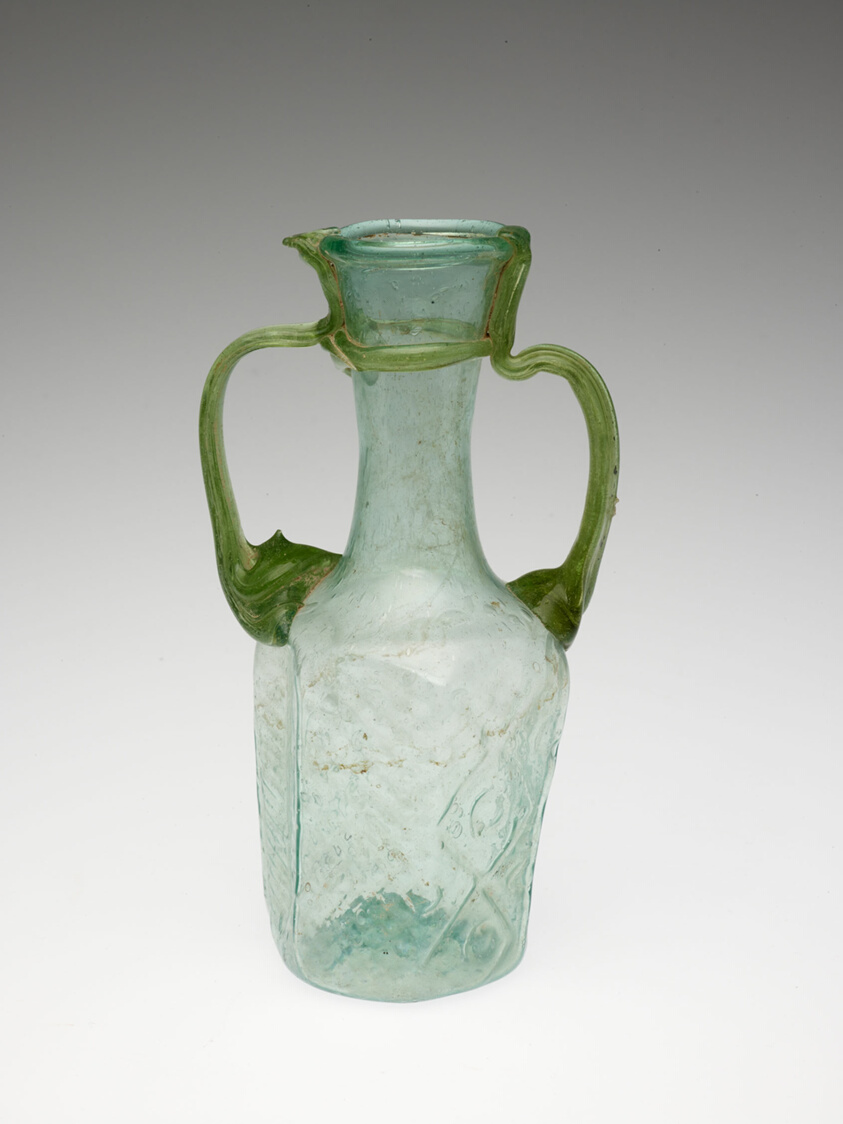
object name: Vessel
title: Double-Handled Bottle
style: syrian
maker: Byzantine; Eastern Mediterranean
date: 6th century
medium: Glass, mold-blown technique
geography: Syria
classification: vessel; glass; ancient art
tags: bottles